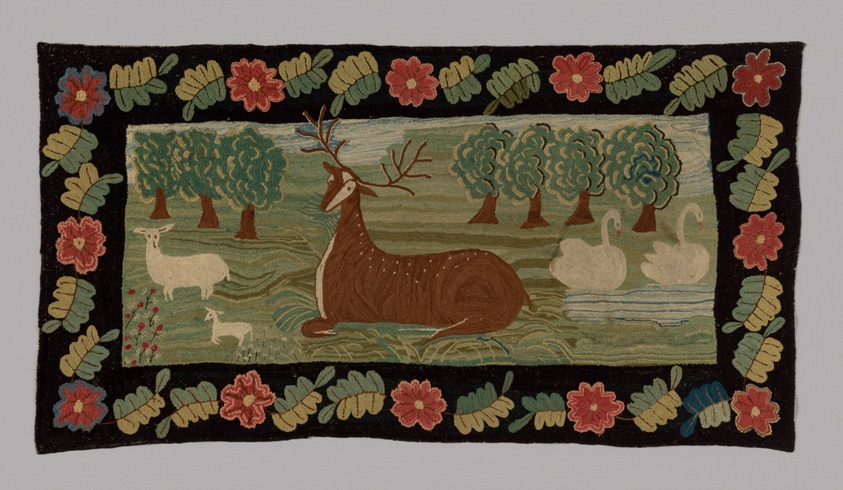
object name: Textile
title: Rug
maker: United States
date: 1775/1825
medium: Wool, plain weave embroidered with wool yarn in outline, running, satin and stem stitches forming uncut pile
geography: United States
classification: textile; needlework - rug; embroidery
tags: deer, flowers, foliage, sheep, swans